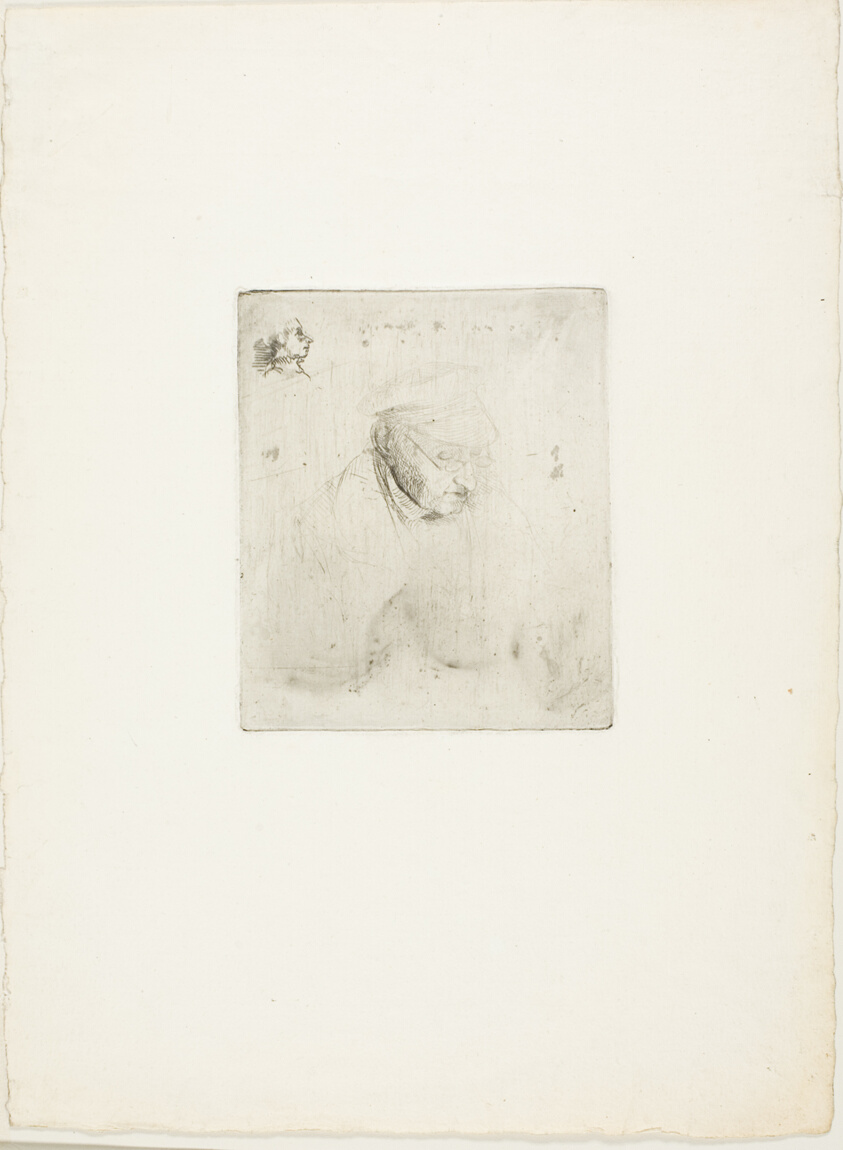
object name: Print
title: René-Hilaire De Gas, Grandfather of the Artist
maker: Edgar Degas; French, 1834-1917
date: 1856–57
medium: Etching and drypoint in blackish-brown on ivory laid paper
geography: France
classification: etching; print; prints and drawing; paper